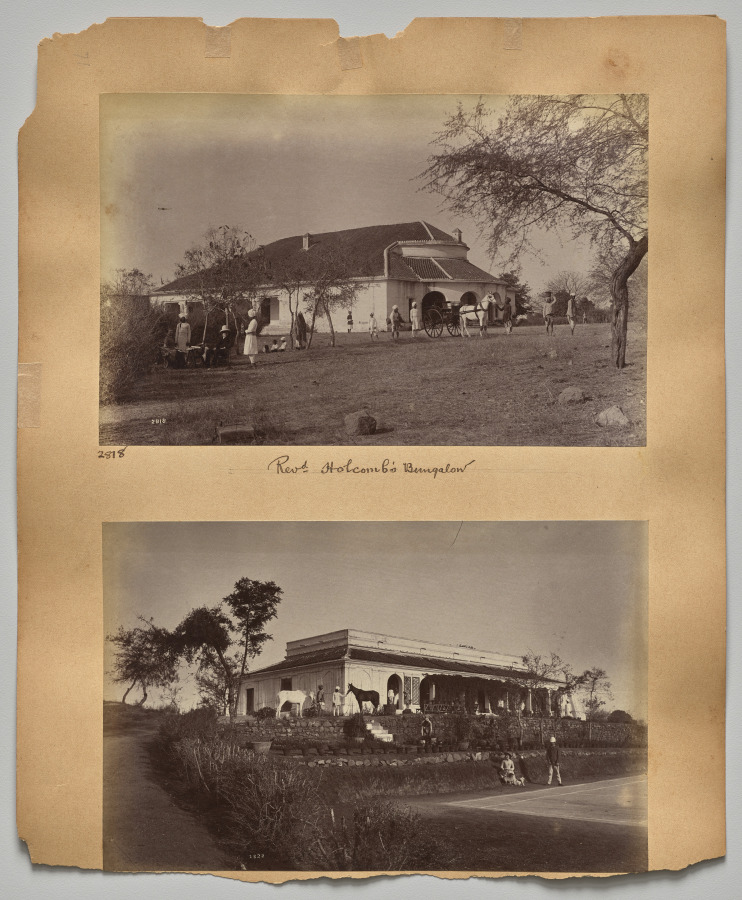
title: Untitled (verso, bottom)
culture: India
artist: Raja Deen Dayal (Indian, 1844–1905)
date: c. 1882–87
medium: albumen print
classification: Photograph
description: These photographs are part of an album, now disassembled, of around 105 photographs taken in India between 1885 and summer 1887 that provide glimpses into the lives of the British colonial elite and royal and upper-class Indians. The museum holds another group of 37 pictures from this album (2016.266), which was probably commissioned by a British civil servant visiting or working in India around 1888 as a personal souvenir of his experiences there.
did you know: Raja Deen Dayal is regarded now, and was considered during his lifetime, to be India’s most important 19th-century photographer.